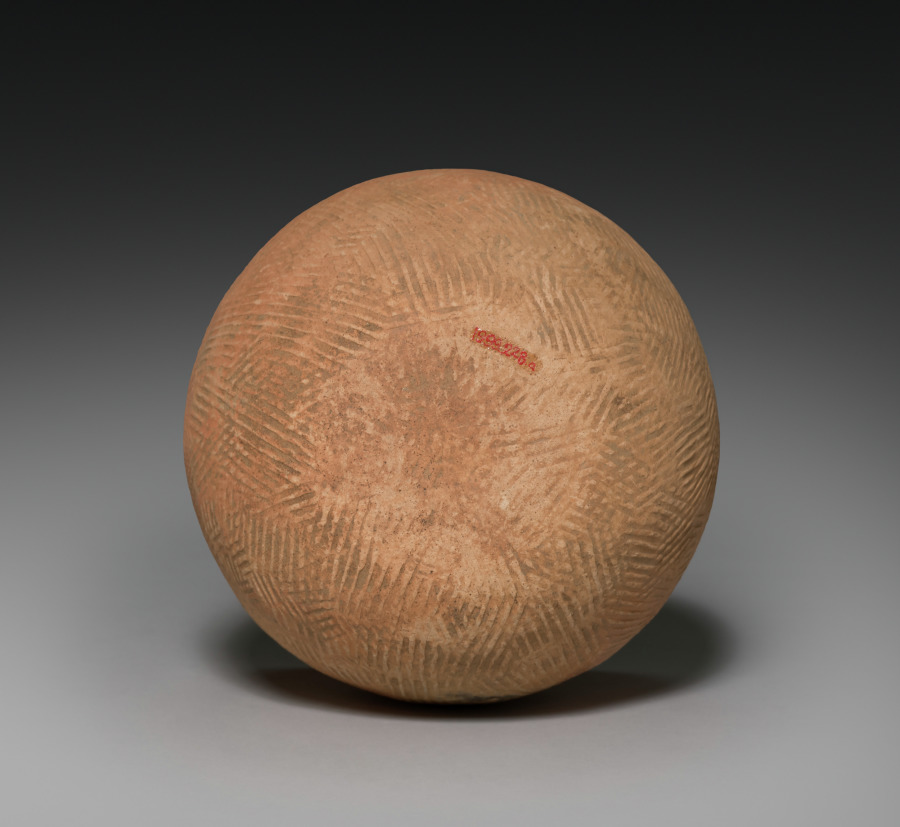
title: Lidded Vessel with Loop Handles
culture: Korea, Iron Age (c. 300–57 BCE)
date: 300–1 BCE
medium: earthenware, with impressed, paddled, and incised decoration and red slip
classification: Ceramic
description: This small storage jar was hand built from coils of clay before it was finished on a potter's wheel. The thick, vertical ridges covering the surface were impressed into the wet clay using a carved wooden paddle. This network of raised lines was then intersected by four incised lines coursing around the bulbous form and separating the body into lower and upper areas with deft visual simplicity. Such direct, effective design solutions to ceramic decoration appear frequently in early Korean ceramics. The two perforations in the upper body were no doubt used to help secure the lid to the body with cord.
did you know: Closed kilns built on hills became widely used for producing this type of pottery vessel in Korea during the Three Kingdoms period.